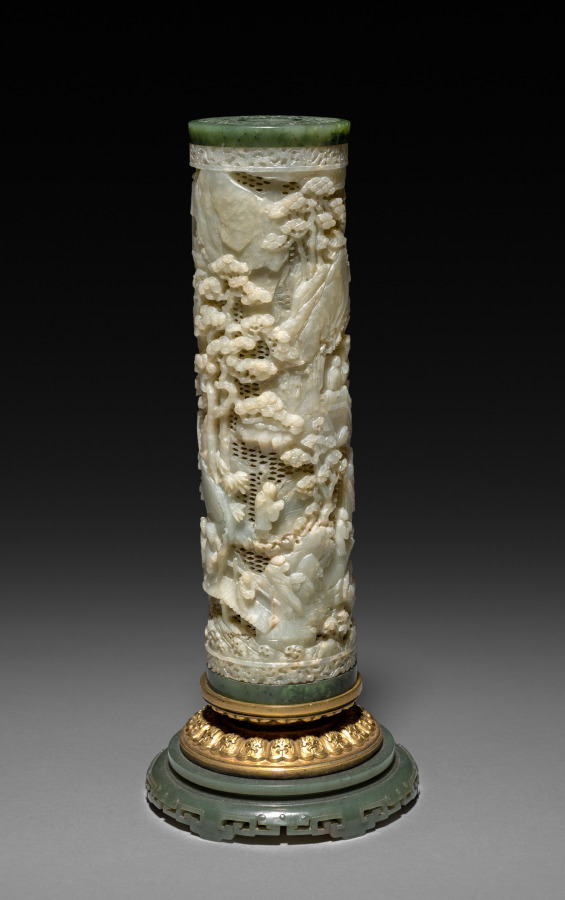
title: Cylinder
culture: China, Qing dynasty (1644-1911) or Republican period (1912-49)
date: 1800–1940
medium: jade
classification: Jade